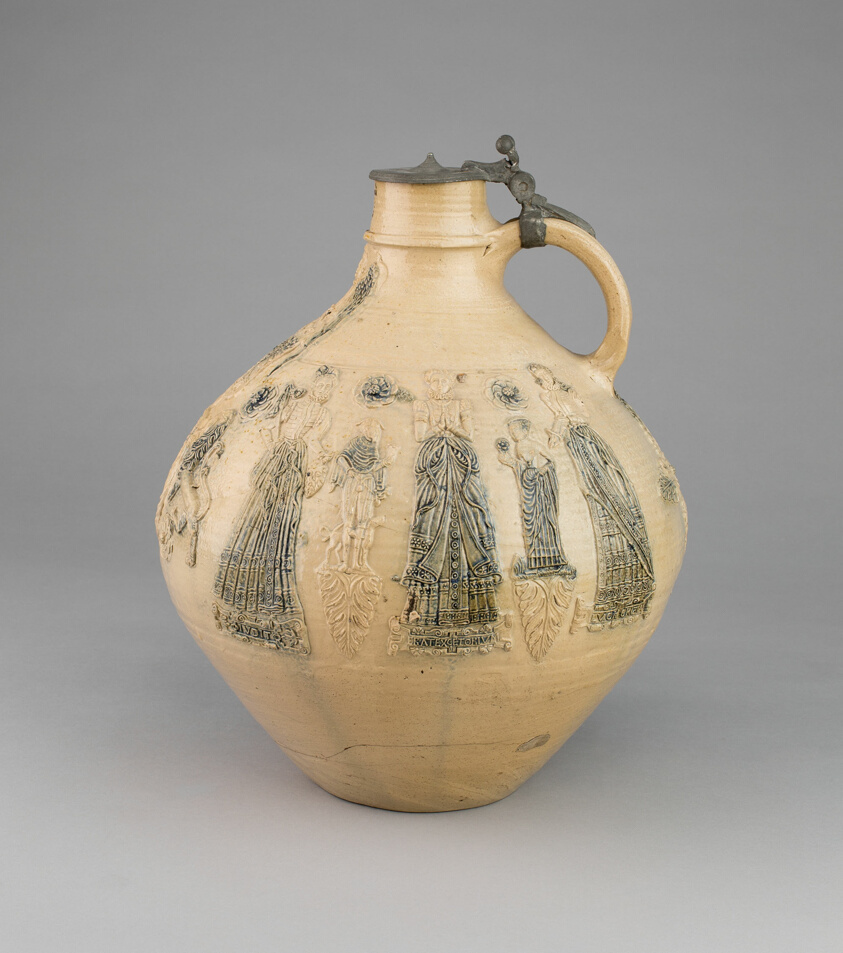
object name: Ceramics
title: Water Jug with Arms of Jülich-Cleves-Berg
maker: Workshop of Anno Knütgen; (German, active 1564-83)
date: 1574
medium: Salt-glazed stoneware and pewter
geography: Germany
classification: tableware; ceramics; stoneware; european decorative arts; decorative arts